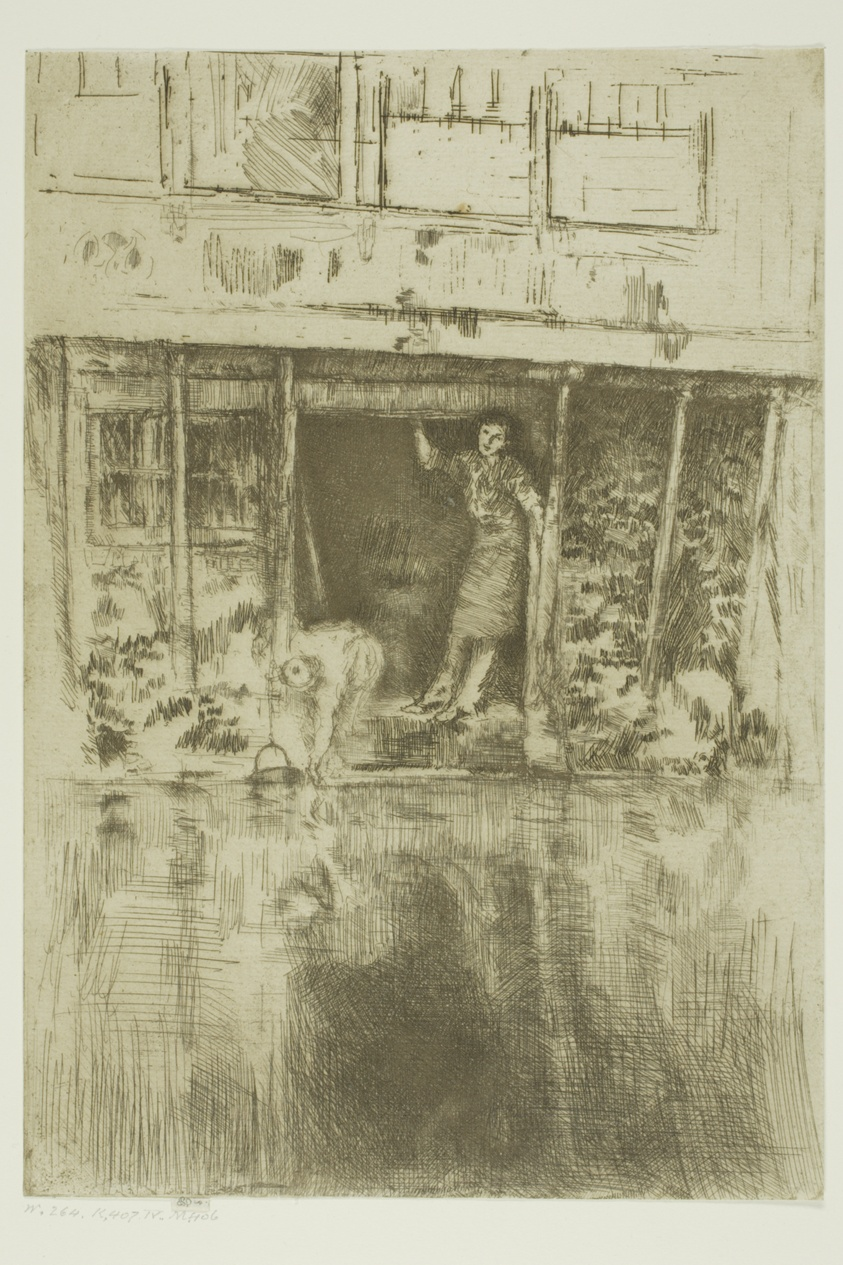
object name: Print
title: The Pierrot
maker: James McNeill Whistler (American, 1834-1903)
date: 1889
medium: Etching in brown ink on cream laid paper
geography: United States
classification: etching; print; prints and drawing; paper